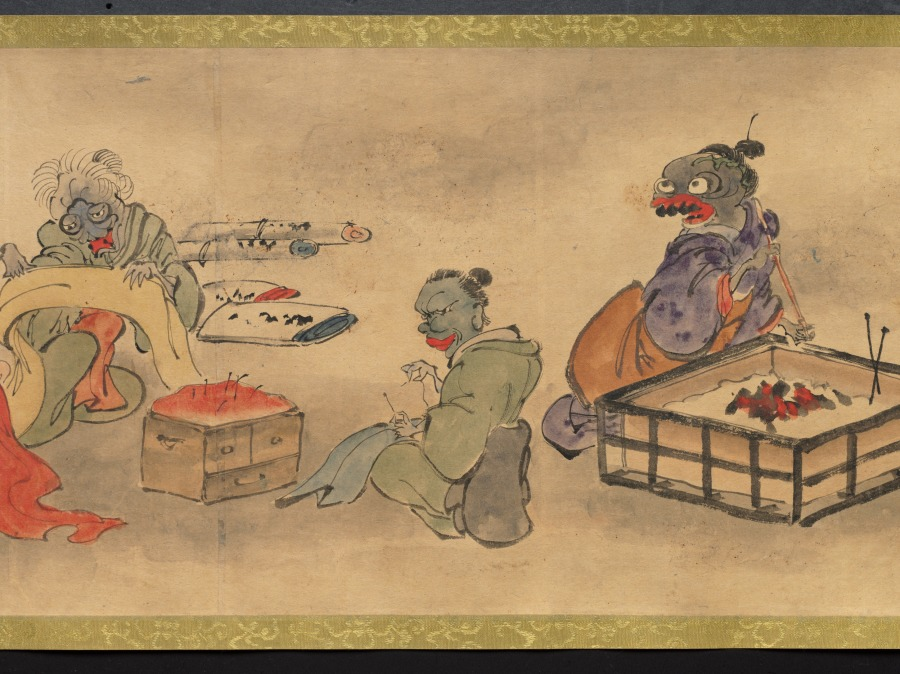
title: An Illustrated Marriage of Apparitions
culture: Japan, Edo period (1615–1868)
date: mid-1800s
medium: handscroll; ink and color on paper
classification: Painting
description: The matchmaking, engagement, wedding, and birth of the first child of two apparitions, or bakemono, literally "things that change," are illustrated in this whimsical, humorous handscroll. Japanese folklore abounds with such strange creatures, most famously represented in handscrolls featuring a procession of 100 supernatural monsters. Aside from a textual preface and cartouches indicating the content of the scenes, the tale is told visually. The artist and whereabouts of the original handscroll are unknown, but a number of other 19th-century copies by amateur painters exist in Japanese collections, attesting to its broad appeal.